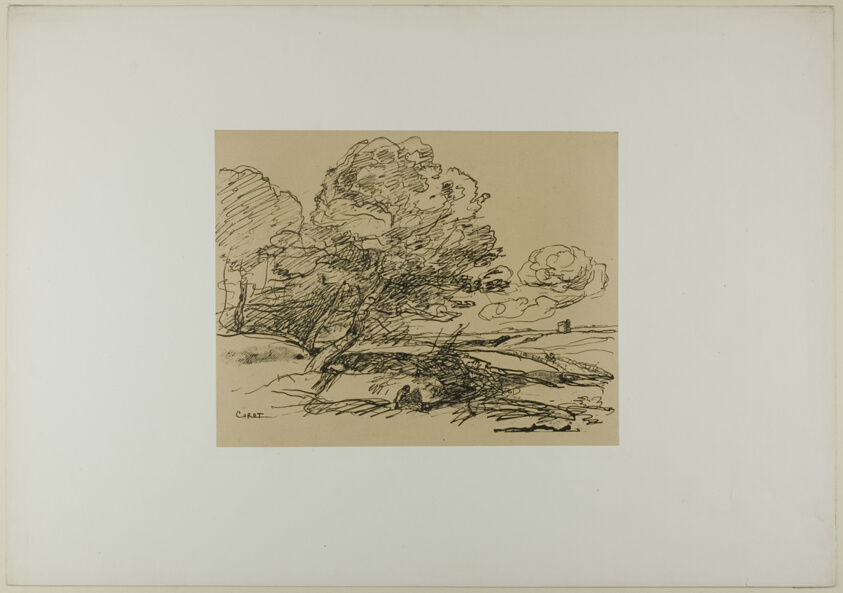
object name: Print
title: The Lonely Tower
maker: Jean-Baptiste-Camille Corot; French, 1796-1875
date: 1871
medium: Transfer lithograph in black on tan China paper laid down on white wove paper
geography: France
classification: lithograph; print; prints and drawing